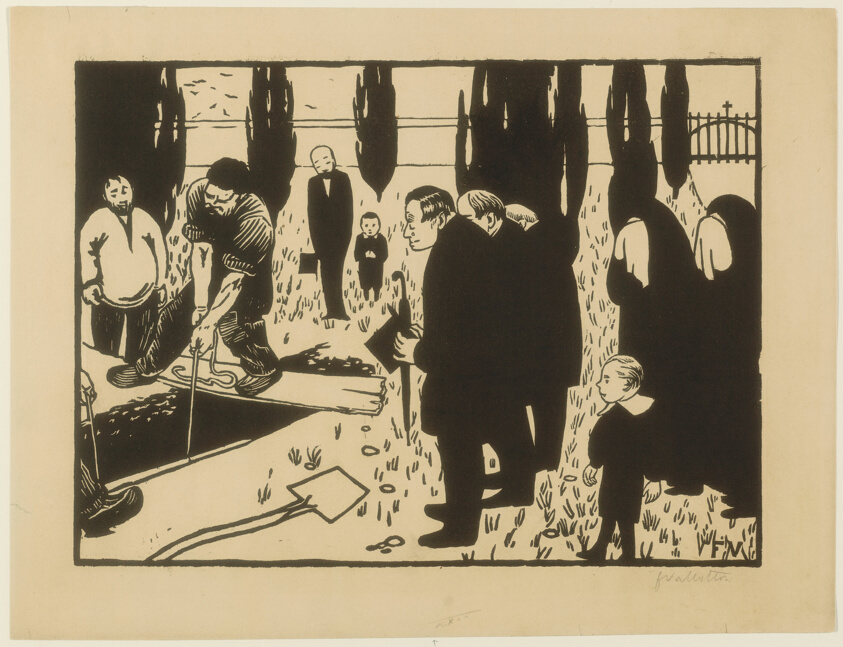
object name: Print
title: The Funeral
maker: Félix Edouard Vallotton (French, born Switzerland, 1865-1925)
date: 1891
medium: Woodcut in black ink on tan wove paper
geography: France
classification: woodcut; print; prints and drawing